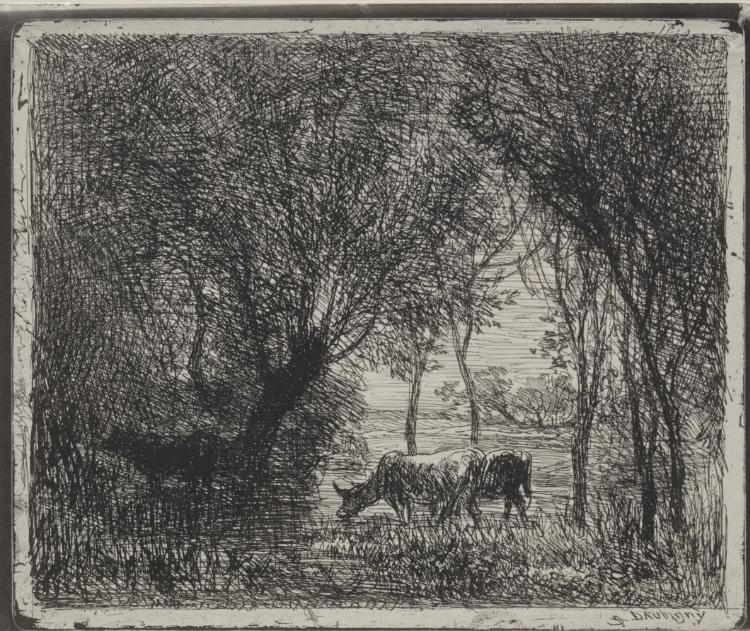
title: Cows in the Woods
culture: France, 19th century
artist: Charles François Daubigny (French, 1817–1878)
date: original impression 1862, printed in 1921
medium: cliché-verre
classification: Print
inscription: signed, lower right, in glass plate: C. Daubigny